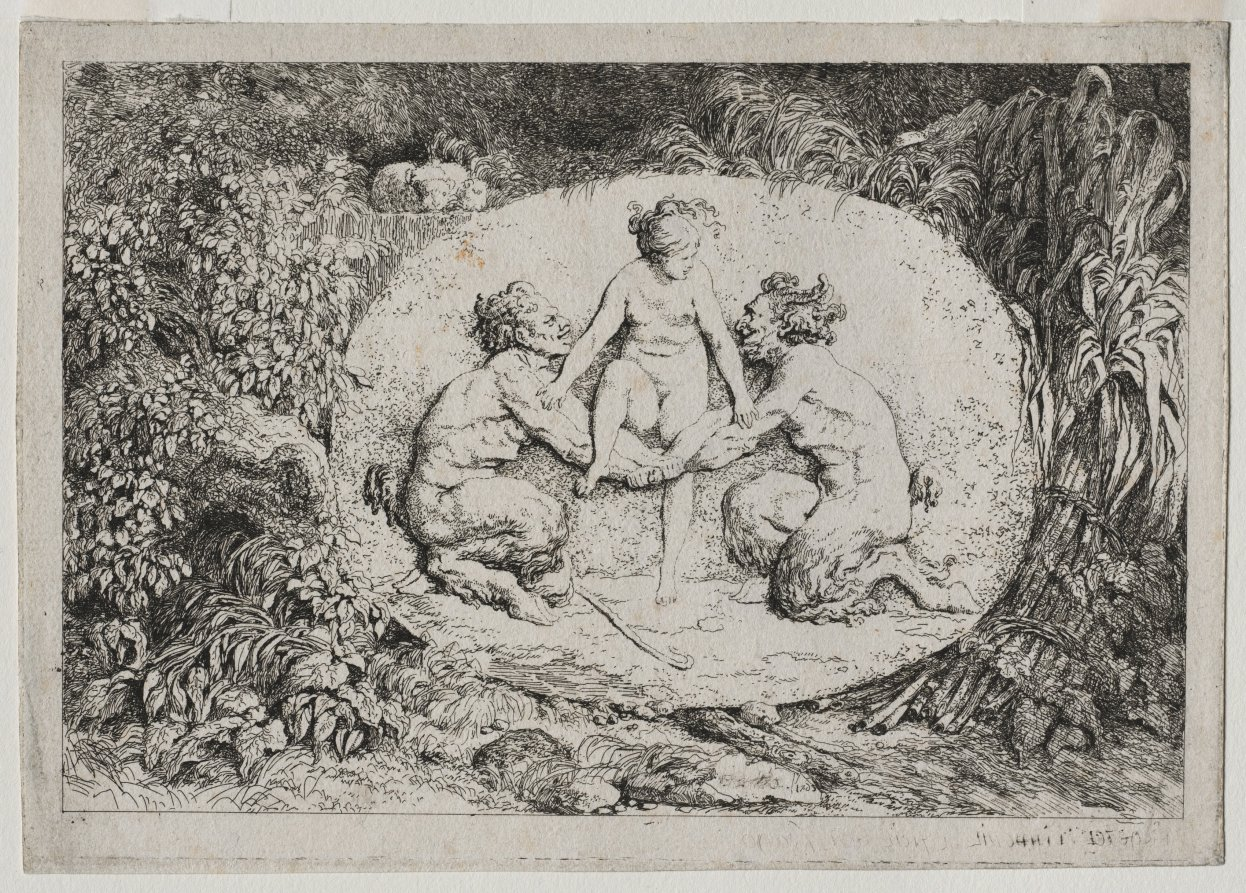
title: Bacchanales: Nymph Supported by Two Satyrs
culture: France, 18th century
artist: Jean-Honoré Fragonard (French, 1732–1806)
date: 1763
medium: etching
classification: Print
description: Jean-Honoré Fragonard made these four etchings shortly after returning to Paris from Italy, where he studied antique subjects and sculpture. He may have also looked at other sources for inspiration, such as Jacques François Joseph Saly’s suite of vase designs. Though the prints feature the followers of Bacchus, the wine god does not make an appearance. Instead, Fragonard highlighted the playfully erotic frolics, conflicts, and even family life of a group of bacchants, conceiving them as low-relief sculptures on stone fragments within abundant foliage. Fragonard’s creations helped to popularize revelries in nature in French art, architecture, and garden design during the later 1700s.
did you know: Historically, mythological scenes offered artists and viewers a socially acceptable reason to depict and enjoy nude figures.